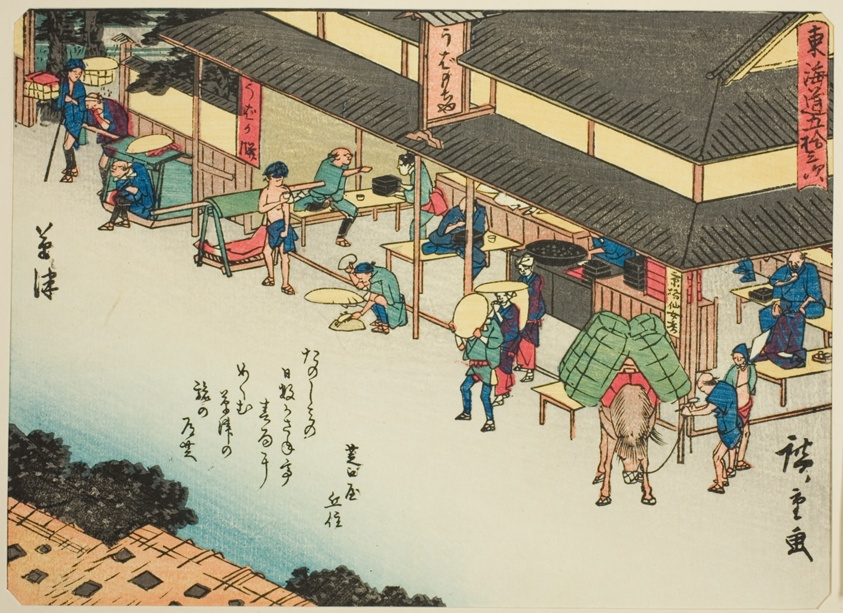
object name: Print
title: Kusatsu, from the series "Fifty-three Stations of the Tokaido (Tokaido gojusan tsugi)," also known as the Tokaido with Poem (Kyoka iri Tokaido)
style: Japanese (culture or style)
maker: Utagawa Hiroshige 歌川 広重; Japanese, 1797-1858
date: c. 1837/42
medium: Color woodblock print; chuban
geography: Japan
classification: woodblock print; print; asian art